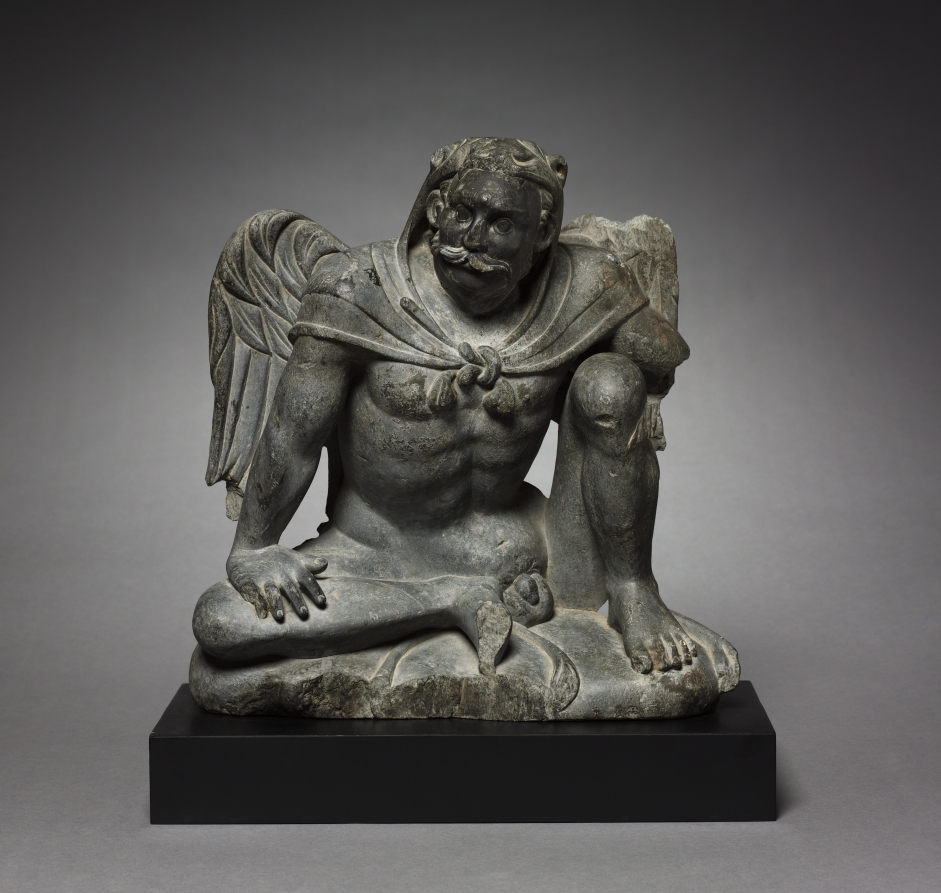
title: Winged Atlas-Hercules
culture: Pakistan, Gandhara, Gandhara period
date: 200s CE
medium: schist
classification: Sculpture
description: In Buddhist art of the Gandharan region during the time of heightened contact with the Mediterranean world, the figure of Atlas was adopted, but given wings so as to appear superhuman. This figure has been conflated with the image of Hercules, who wears the skin of the Nemean lion, and relieved Atlas of his duties for a short time. Repeated images of composite Atlas-like figures surrounded the base of the monuments called stupas, which were solid domes, and can be understood as symbols for the sky, which would have appeared as though supported by rows of titanic figures. Other examples of this figure hold a thunderbolt (vajra) in one hand, suggesting that he could also allude to Vajrapani, an early protector divinity of the Buddha. Images of Vajrapani can combine attributes of Hercules, Zeus, and Hermes.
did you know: This figure combines the attributes of Atlas, Hercules, and Vajrapani.